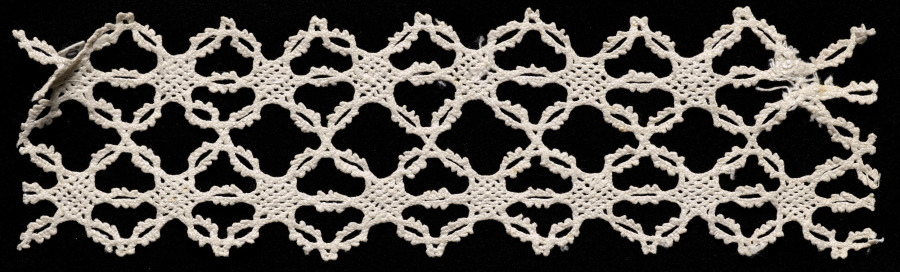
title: Lace Insertion (no selvage)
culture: Italy, Venice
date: 1540–60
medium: Bobbin lace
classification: Lace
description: The design of this lace fragment is similar to that found in lace trimmings made of gold, silver, and colored silk threads.